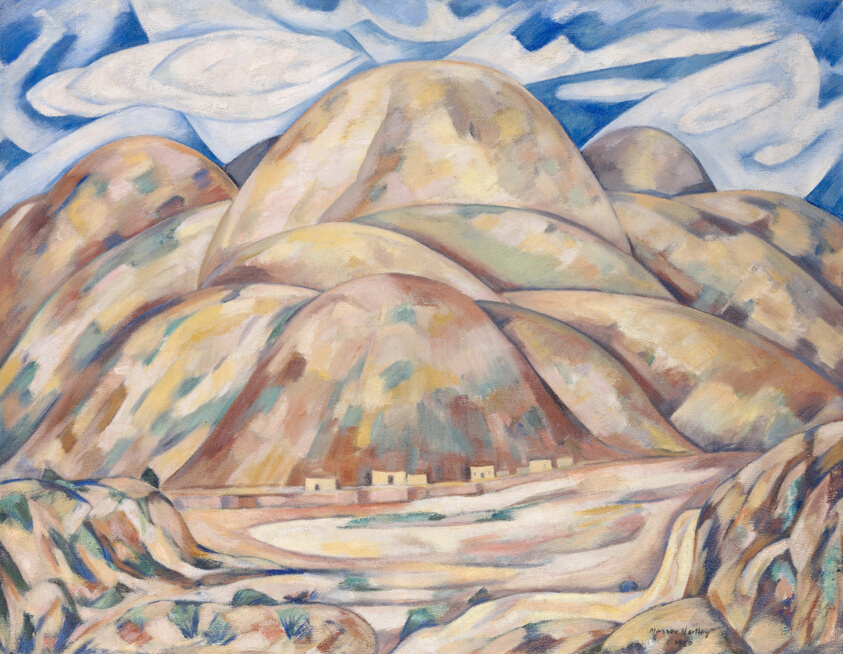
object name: Painting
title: Landscape No. 3, Cash Entry Mines, New Mexico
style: Modernism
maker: Marsden Hartley (American, 1877–1943)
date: 1920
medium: Oil on canvas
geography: New York City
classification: painting; modern and contemporary art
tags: landscapes